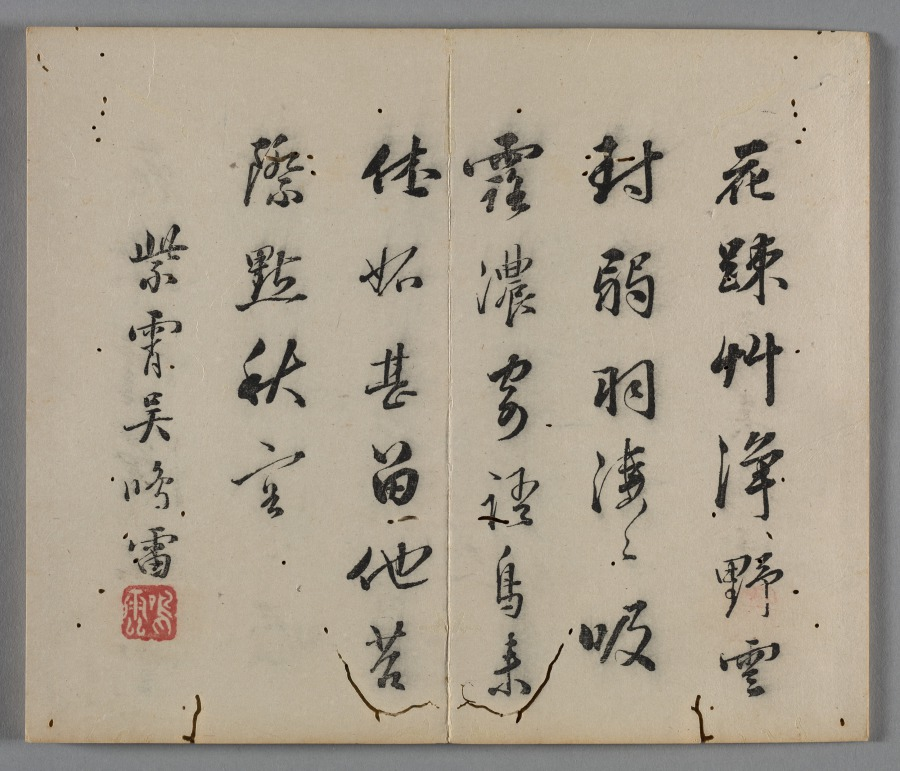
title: Ten Bamboo Studio Painting and Calligraphy Handbook (Shizhuzhai shuhua pu): Birds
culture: China, Qing dynasty (1644-1911)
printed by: Hu Zhengyan (Chinese, c. 1584–1674)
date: 1633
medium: Woodblock-printed book; ink and colors on paper; first edition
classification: Print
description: Color printing reached a level of perfection in the early 1600s, as seen in this Ten Bamboo Studio Collection of Calligraphy and Painting and the Mustard Seed Garden Manual of Painting (printed 1679 and 1701). The painterly quality, precision in registering (aligning) the woodblocks, and harmonious colors made them the most successful color print editions in Chinese history. Both editions were printed and compiled in Nanjing, spread nationwide, and had a great impact on the arts in Japan and Korea.